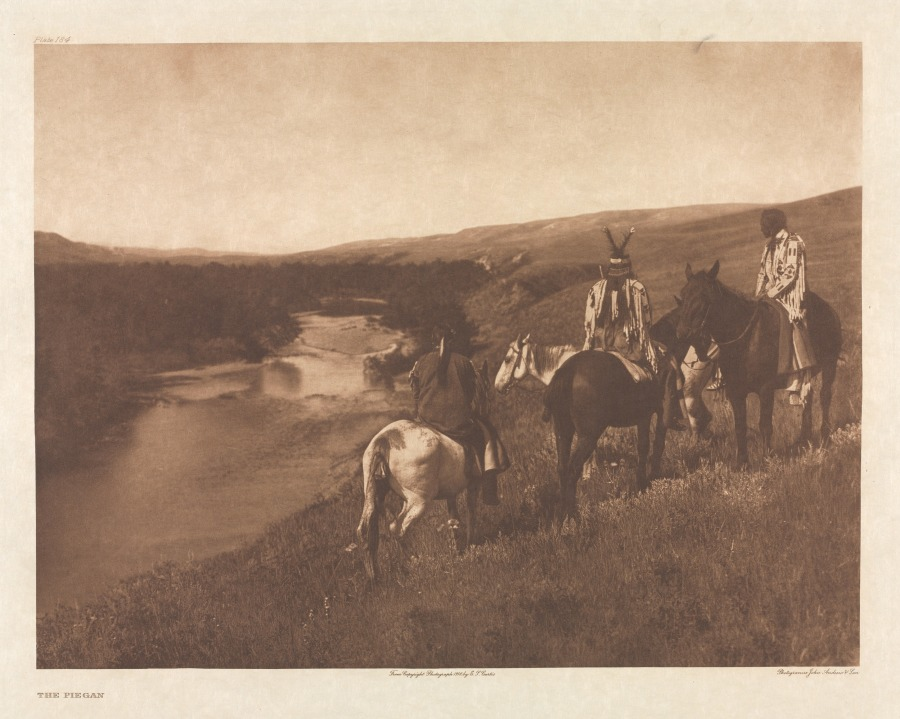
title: Portfolio VI, Plates 184- 219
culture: America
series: The North American Indian: being a series of volumes picturing and describing the Indians of the United States, The Dominion of Canada, and Alaska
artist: Edward S. Curtis (American, 1868–1952)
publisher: The University Press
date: 1900–1911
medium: photogravure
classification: Portfolio